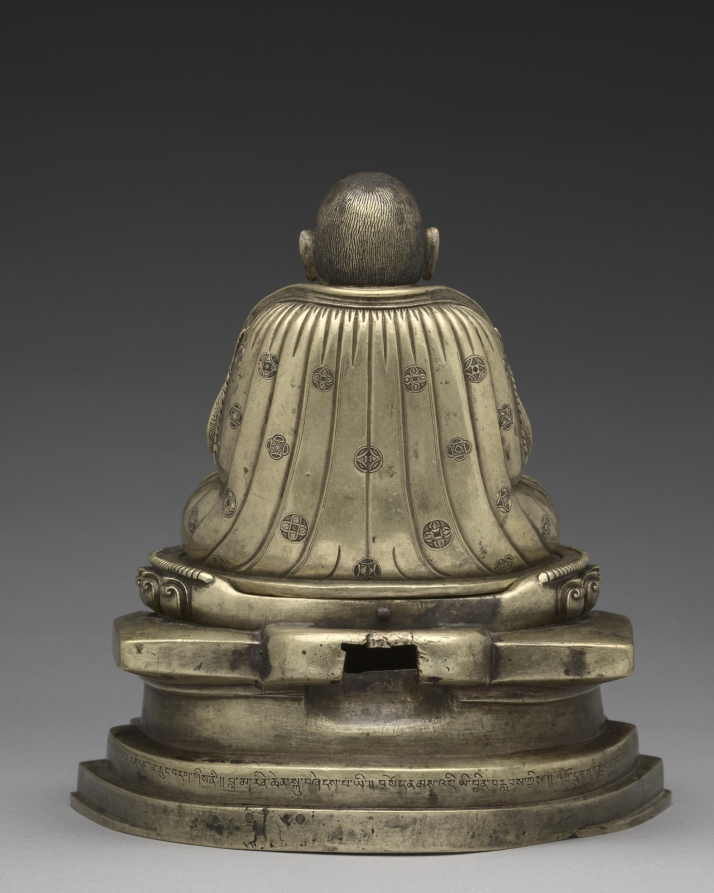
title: Portrait of Phagmo Drupa Dorje Gyalpo (1110–1170)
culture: Central Tibet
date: 1200s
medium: gilt bronze with gold, silver, copper, turquoise, lapis, and coral inlay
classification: Sculpture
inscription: / / Na mo 'ghu ru / / Ngan lam ban chung bdag gis ni / / bla ma Rin chen sku bzhengs pa yi / / bsod nams 'di yi byin brlabs kyis / / 'gro drug sdug sngal zad par shog / / Translation: "Salutations to the master ! May the sufferings of the six kinds of beings be appeased through the blessing of merit gained by me, the little monk of Ngan.lam, in having this statue of the Lama Rin.chen made."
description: This portrait statue depicts the first monastic leader of the prominent Buddhist monastery of Densatil, an influential early leader of the Tibetan Buddhist monastic order called Kagyu, famous for his views on the importance of meditation. He sits on a lotus pedestal and lion throne, like a Buddha, and his hand positions (mudras) communicate that meditation leads to enlightenment.